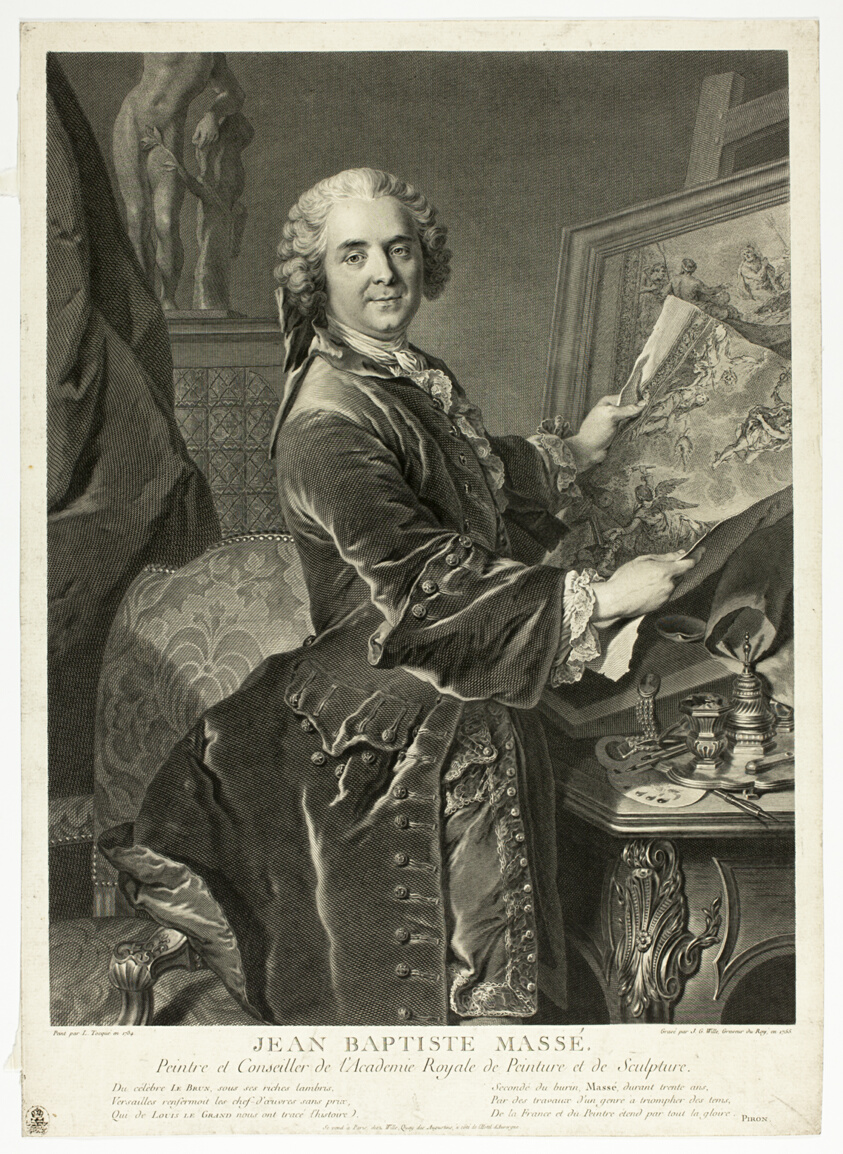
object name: Print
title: Portrait of Jean Baptiste Massé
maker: Johann Georg Wille (German, 1715-1808); after Jean Louis Tocqué (French, 1696-1772)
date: 1755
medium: Engraving on ivory laid paper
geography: Germany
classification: engraving; print; prints and drawing; paper